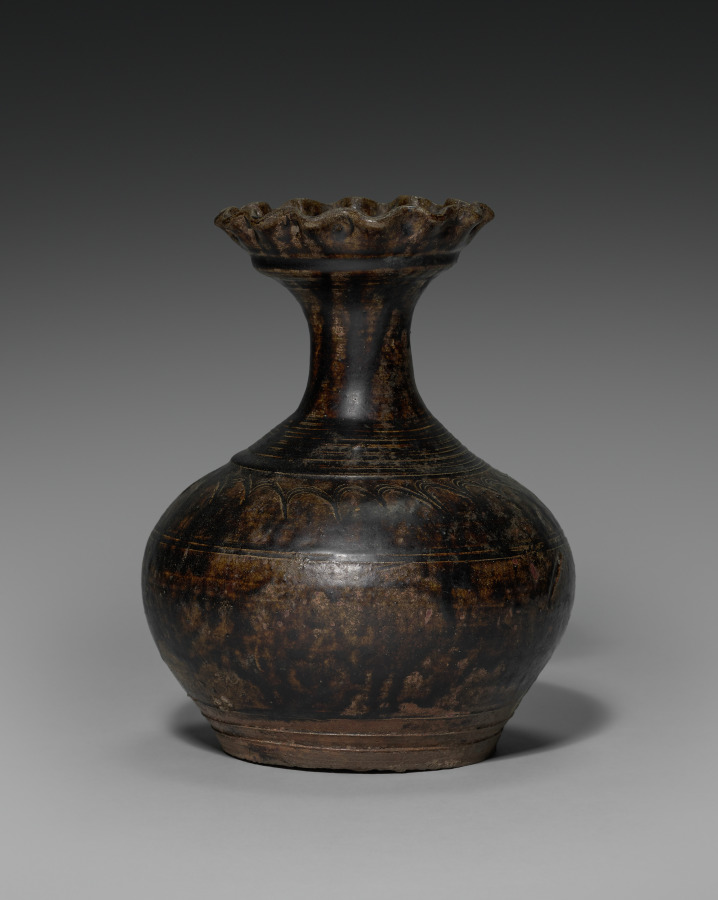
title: Khmer Vase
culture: Cambodia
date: 1100s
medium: earthenware with dark brown glaze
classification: Ceramic